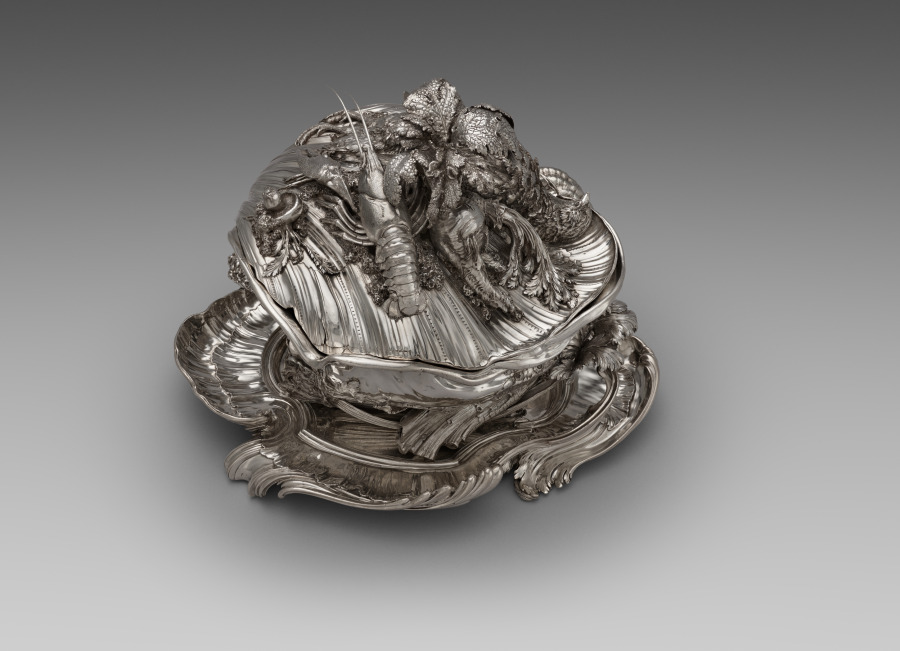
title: Covered Tureen on Stand (Pot-à-oille)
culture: France, Paris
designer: Juste-Aurèle Meissonnier (French, 1695–1750)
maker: Pierre-François Bonnestrenne (French)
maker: Henry Adnet (French, 1745)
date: 1735–38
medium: silver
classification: Silver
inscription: [Maker’s mark of Pierre−François Bonnestrenne, beneath platter; inside tureen (two marks)]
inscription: [Warden's mark for Paris, 1734−1735, beneath platter; inside tureen; inside cover]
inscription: [Charge mark of Hubert Louvet, Paris, 1732-1738, on platter border; beneath platter; beneath tureen; inside cover; inside tureen (two marks)]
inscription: [Discharge mark of Louis Robin mostly used for stamping small work, Paris 1738−1744, on platter border; beneath tureen]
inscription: [Warden's mark for Paris, 1736−1737, on platter border]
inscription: [Possibly British import mark, London, 1925, on platter border]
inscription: [Possibly mark of the British firm Charles & Richard Comyns, on platter border]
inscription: [Discharge of Louis Robin mostly used for stamping gold and silver between 1738 and 1744, beneath tureen; outside cover]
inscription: [Maker’s mark of Henry-Guillaume Adnet, inside cover]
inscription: [Two small undefined marks, inside cover]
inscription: [Under the surface of the platter the engraved signature]: “FAIT-PAR-I-A-MEISSONIER-ARCHITECTTE”; [and the weight] “673=5"; “No. [v] I 50 £ b76Sol”; [and the numbers] “A nº 1”; “A nº2”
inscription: [On tureen lip]: "MEISSONIER"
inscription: [On tureen lip]: “A nº 3”; “A nº2” [in order to place the tureen correctly on the stand]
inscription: [Numbers engraved on the stand, the tureen, and the cover to show how the piece should be assembled]: “A nº 1” [on the base of the tureen; beneath the cover; on the platter], “A nº 2” [on the platter], “A nº 3” [on the exterior rim of the tureen], “A nº4”; “A nº 5” [outside the cover], “A nº 7” [on the border of the platter]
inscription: [Two warden's marks for Paris, 1735-1736, beneath tureen]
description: This tureen exemplifies the French Rococo style, an artistic movement celebrating naturalistic forms that developed in Paris during the early 1700s. In contrast to classical, controlled symmetry, Rococo forms morph, twist, and spill into the space around them. Meissonnier embellished this tureen in a picturesque arrangement of vegetables and creatures, transforming a utilitarian object into a decadent display of wealth and abundance. This masterpiece comes from a set of two tureens commissioned by the English Duke of Kingston during an extended stay in Paris in the 1730s.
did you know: The langoustine, pigeon, and vegetables were cast using real examples giving the silver copies lifelike detail and appearance.